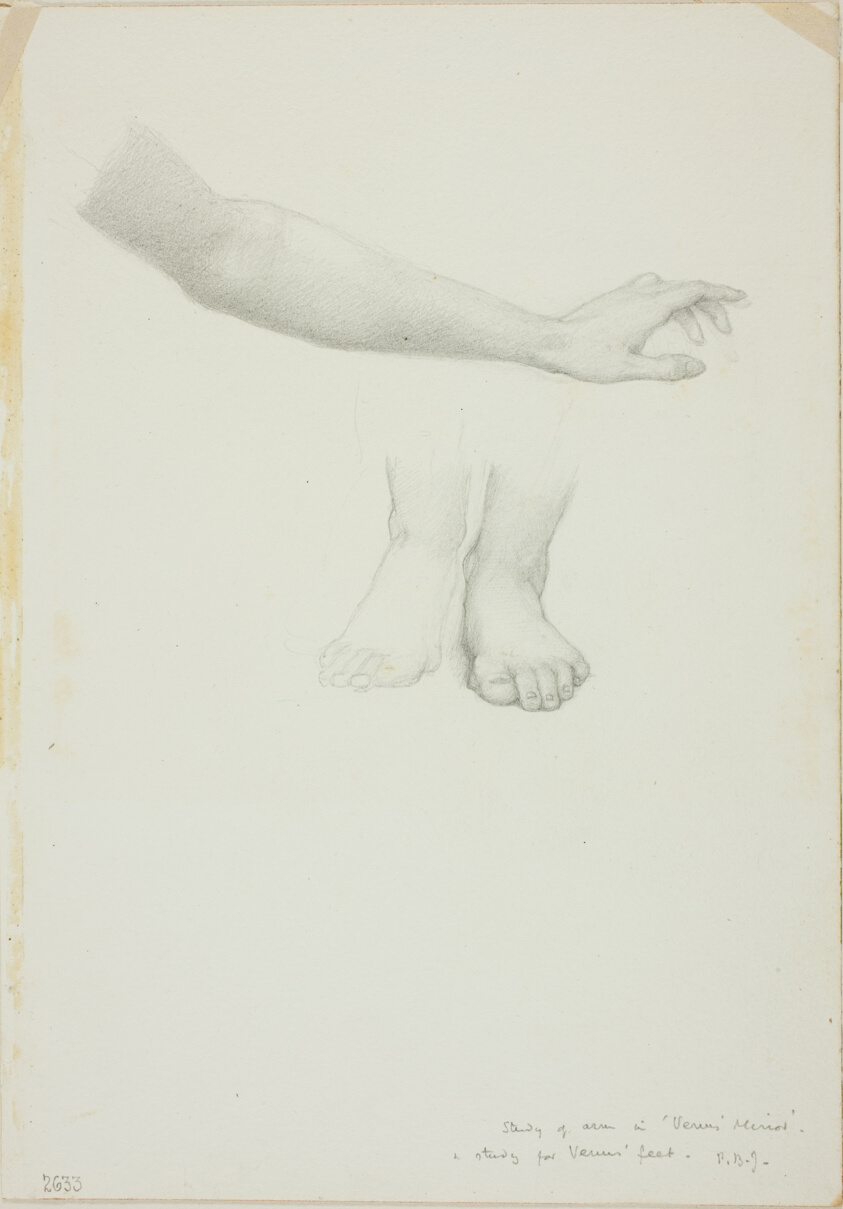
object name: Drawing and Watercolor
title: Arm and Feet, study for Mirror of Venus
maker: Sir Edward Burne-Jones (English, 1833-1898)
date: c. 1873–77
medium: Graphite on ivory wove paper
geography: England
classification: graphite; drawings (visual works); prints and drawing